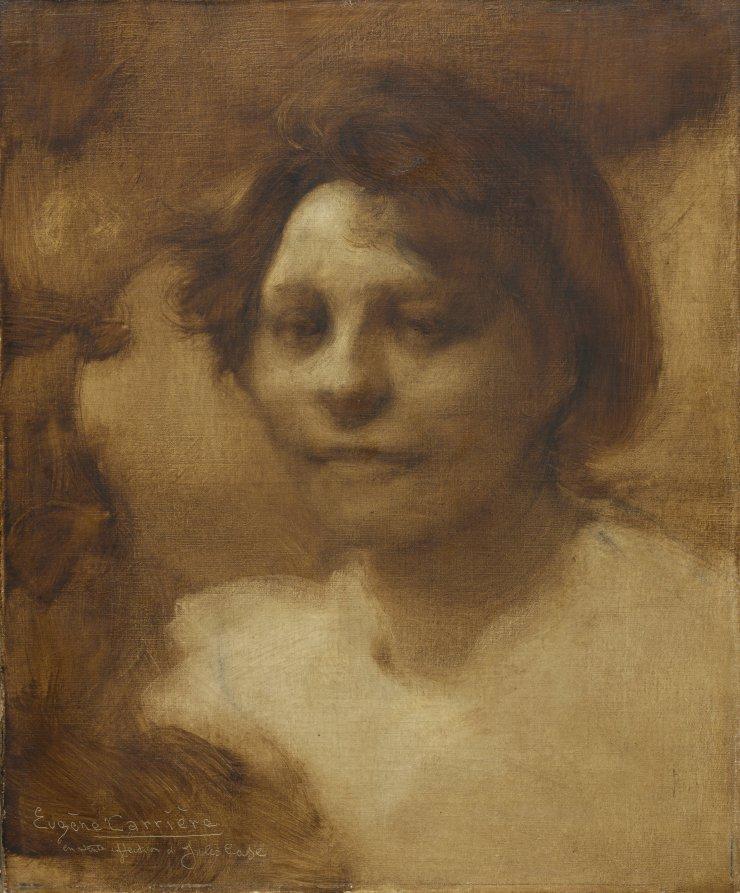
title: Madame Case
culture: France, late 19th-early 20th Century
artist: Eugène Carrière (French, 1849–1906)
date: after September 1900, probably summer 1901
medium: oil on fabric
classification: Painting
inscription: Signed sgraffito into paint at bottom left: Eugène Carrière en toute affection à Jules Case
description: This painting may depict the wife of the artist's close friend, writer Jules Case. In a letter written after her death, Case asked the artist to paint her portrait from an enlarged photograph. "My dear friend," Case wrote, "would you preserve the only face which, from now on, can bring me some little joy, if one can use this word for a sentiment mixed with so much suffering." Carrière emphasized the poetic mood by placing the shadowy figure in a vague, dreamlike space. Known for his evocative paintings of women and children, Eugène Carrière was loosely associated with the French Symbolist movement, which aimed at expressing inner, spiritual life and emotions rather than the outward appearance of physical reality.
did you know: The painting evokes an illusory, dreamy quality that may reflect the fact that Carrière never met his model.